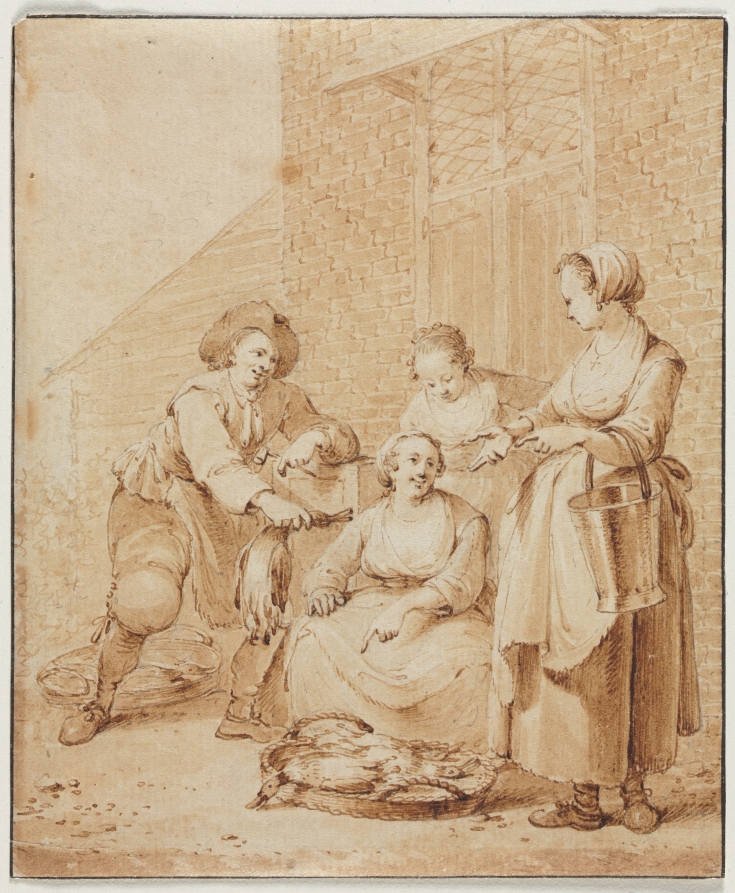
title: The Poultry Woman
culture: Netherlands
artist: Hendrik Meijer (Dutch, 1737–1793)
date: second half 18th century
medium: pen and brown ink and brush and brown wash over black chalk; framing lines in black ink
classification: Drawing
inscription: VERSO, signed, lower left, in brown ink: Hd [d underlined three times] Meyer in et fecit ; upper center, in graphite: 10 ; upper left, in graphite: 29 32 1/2 / P 66